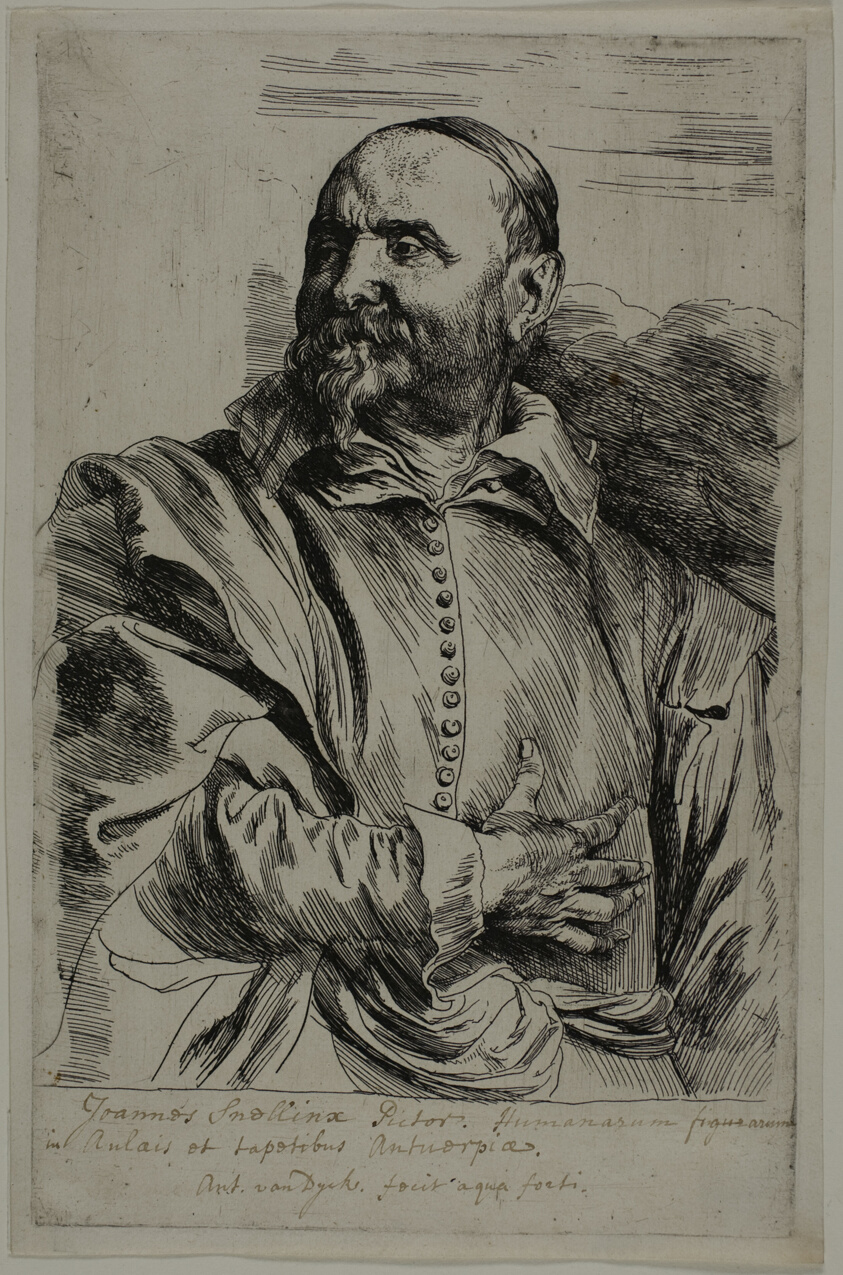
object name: Print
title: Jan Snellinx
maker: Anthony van Dyck (Flemish, 1599-1641)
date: 1630/33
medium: Etching in black on ivory laid paper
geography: Flanders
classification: etching; print; prints and drawing